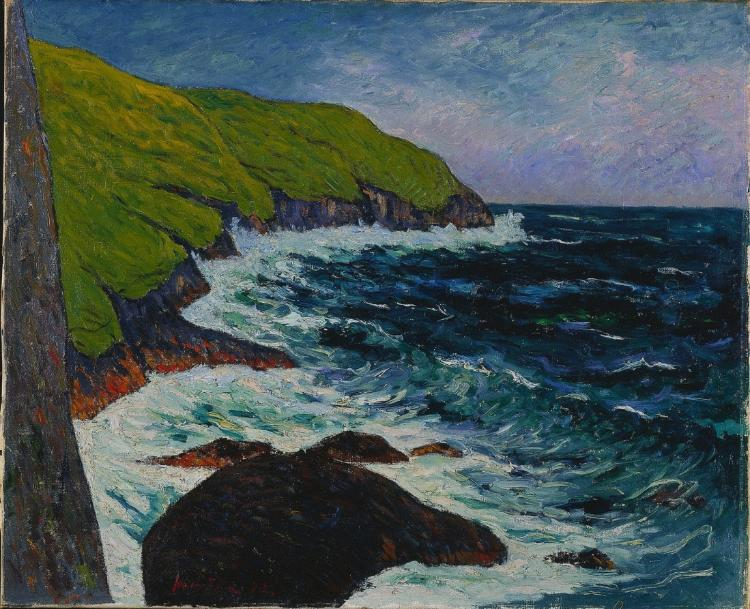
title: The Cliffs at Beg-ar-Fry, Saint-Jean-du-Doigt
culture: France, 19th century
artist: Maxime Maufra (French, 1861–1918)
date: 1895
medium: oil on fabric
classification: Painting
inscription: Signed lower left: Maufra 95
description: Maxime Maufra was initially an amateur artist, but in 1883 he gave up a career in business to devote himself entirely to painting. He traveled throughout Normandy and Britany painting sea- and landscapes. During a visit to Pont-Aven in northwestern France in 1890 he met Paul Gauguin and a group of young artists who were inspired by Gauguin’s approaches to color and composition in his art. In particular, Maufra began to translate forms into flat planes of bold color arranged in decorative patterns as seen in this seascape of the Breton coast. Perhaps the most striking aspect of this painting is the way the artist framed the composition at the left with the view of a steep cliff.